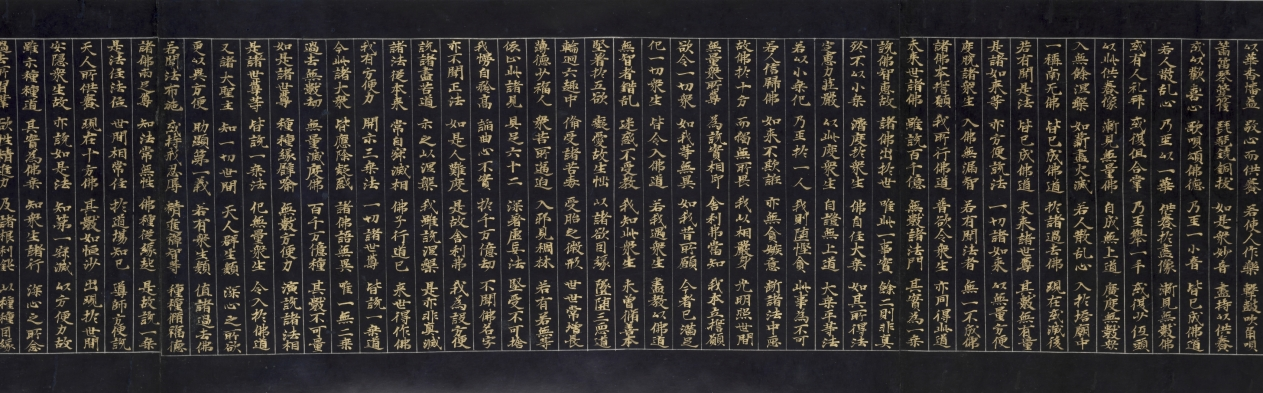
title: Lotus Sutra with a Frontispiece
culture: China, Song dynasty (960–1279)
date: late 1100s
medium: handscroll; gold ink on indigo sutra paper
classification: Painting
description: The frontispiece of this sutra, a sacred Buddhist scripture, illustrates episodes mentioned in the Buddha’s teaching. The sutra begins with a description of the historic Buddha Shakyamuni’s assembly on Vulture Peak. On the right, the Buddha sits amid members of his congregation: lohans (or arhats), bodhisattvas, gods, and other beings. The narrative proceeds from right to left. Heavenly light emanates from Shakyamuni’s brow to “illuminate the eighteen thousand worlds to the east.” Illustrated immediately below the ray is the sutra’s promise that if anyone carves or paints images of the Buddha “they will achieve the Buddha path.” The female figures in the frontispiece point to another promise made in this popular Mahayana school sutra, namely that female devotees and nuns who read the sutra are promised Buddhahood and salvation.